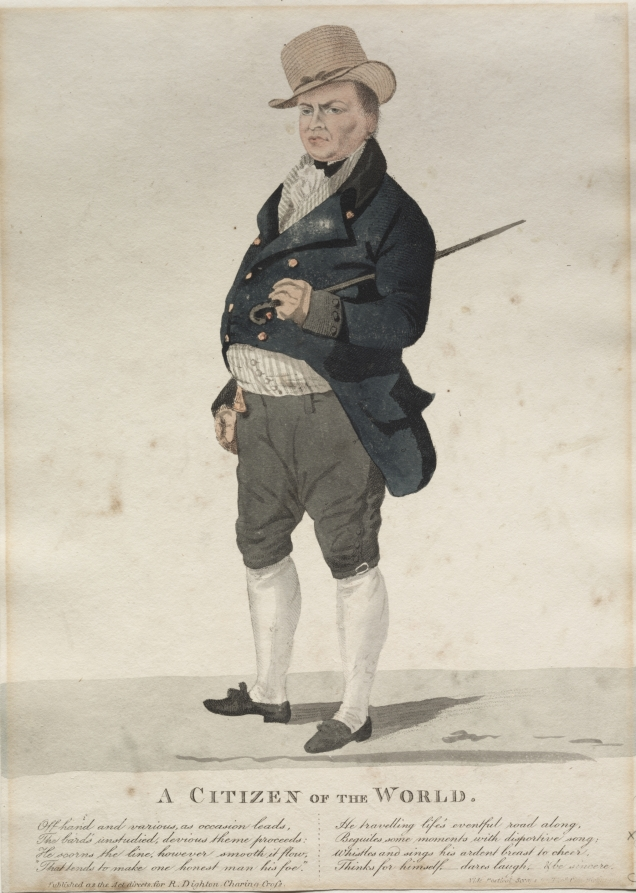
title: A Citizen of the World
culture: England, 19th century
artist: Richard Dighton (British, 1795–1880)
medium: etching, hand colored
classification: Print